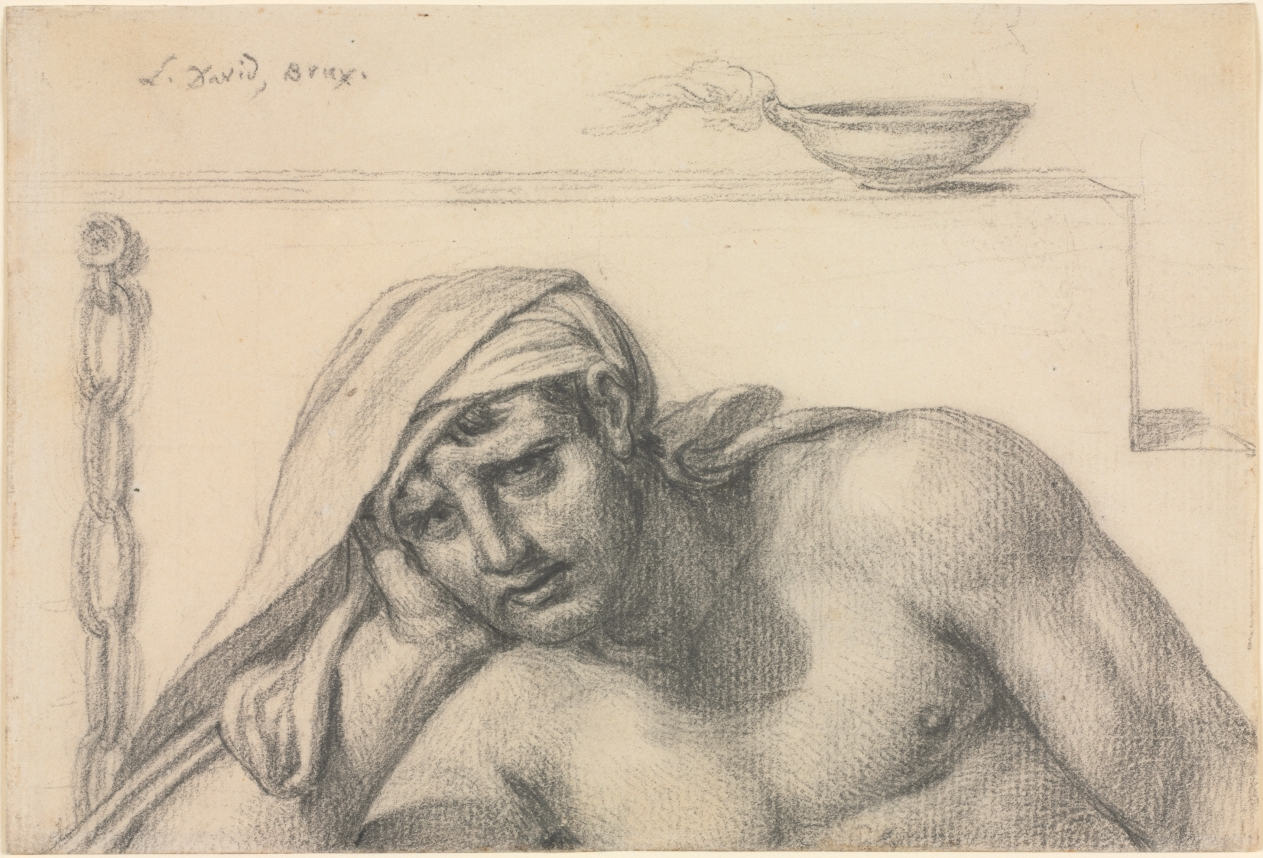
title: The Prisoner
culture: France, 19th century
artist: Jacques-Louis David (French, 1748–1825)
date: c. 1816–22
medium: black chalk on cream laid paper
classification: Drawing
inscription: inscribed, at upper left, in black chalk: L. David, Brux.; inscribed, on an old support, now removed: 1 des. de L. David.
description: This drawing belongs to a series of enigmatic sheets that the French artist Jacques-Louis David created while living as an exile in Brussels from 1816 until his death in 1825. Many of these untitled works present close-up views of expressive heads and were given by the artist to his friends. This image of a turbaned man next to a hanging chain and oil lamp loosely references David's painting The Intercession of Saint Roch (1780) from much earlier in his career.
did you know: Scholars have suggested that Jacques-Louis David might have intended this drawing as a portrait of Napoleon Bonaparte, who the artist supported. The former leader died a prisoner on the island of Saint Helena in 1821.